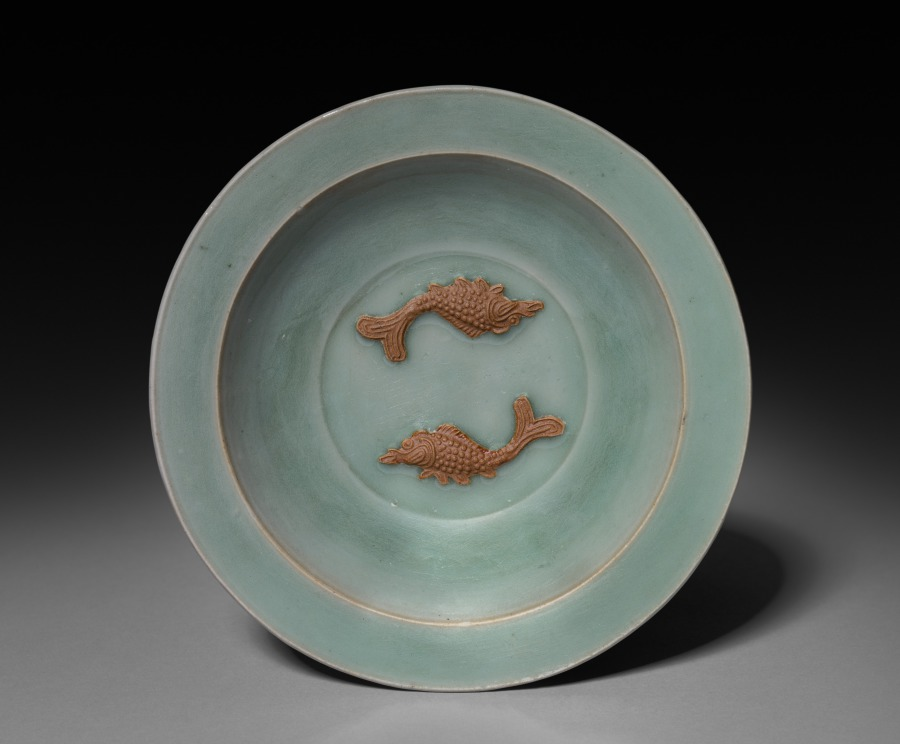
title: Dish with Two Fish in Relief: Longquan Ware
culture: China, Zhejiang province, Yuan dynasty (1271-1368)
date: early 14th Century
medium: glazed porcelain with unglazed molded decoration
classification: Ceramic